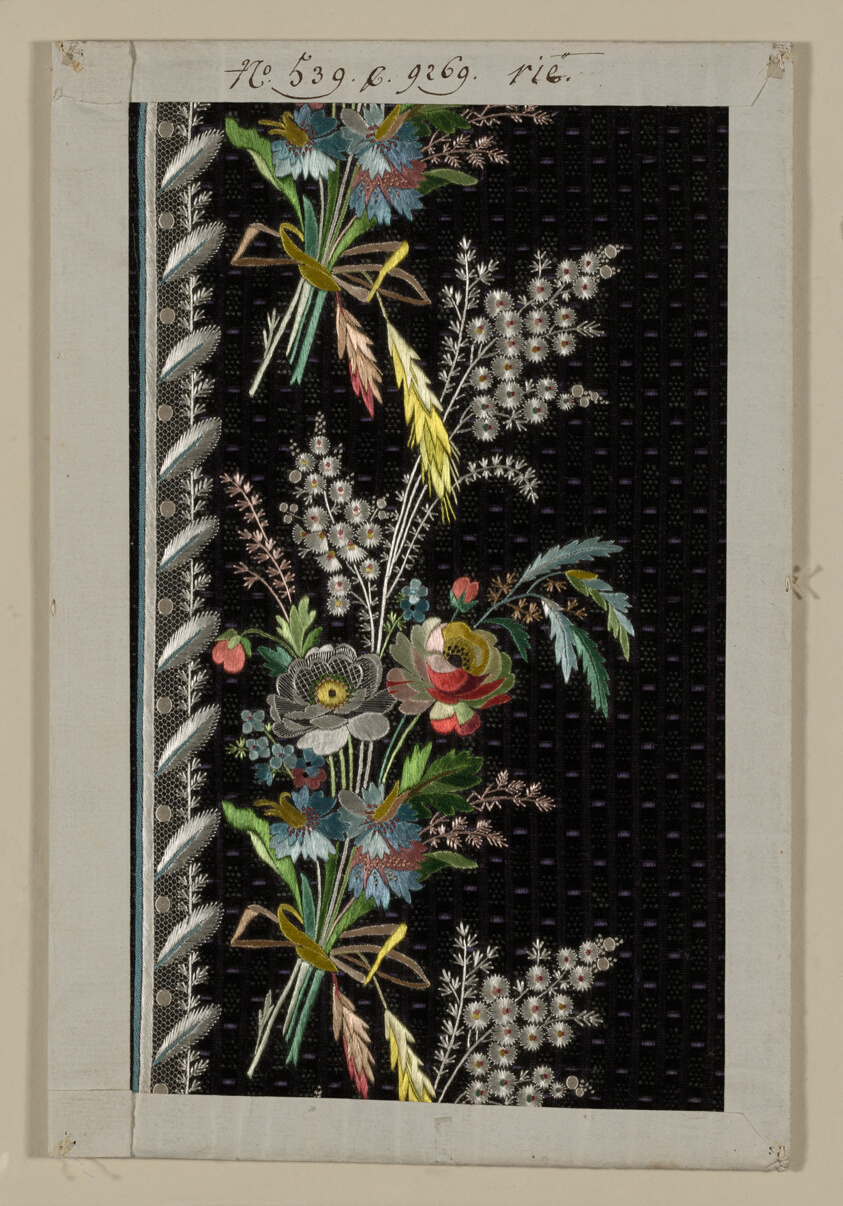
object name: Textile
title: Salesman's Sample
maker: Probably France, Lyon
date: 1780-1810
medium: Silk, plain weave with supplementary patterning warps, supplementary patterning wefts, and two color supplementary pile warps forming cut solid velvet; appliquéd with linen, knotted netting; embroidered with silk floss and yarns in outline, satin, padded satin, single satin and stem stitches; couching and French knots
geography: France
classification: textile; needlework (visual works); costume; costume - embroidery; embroidery; needlework - costume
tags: flora, flowers, foliage